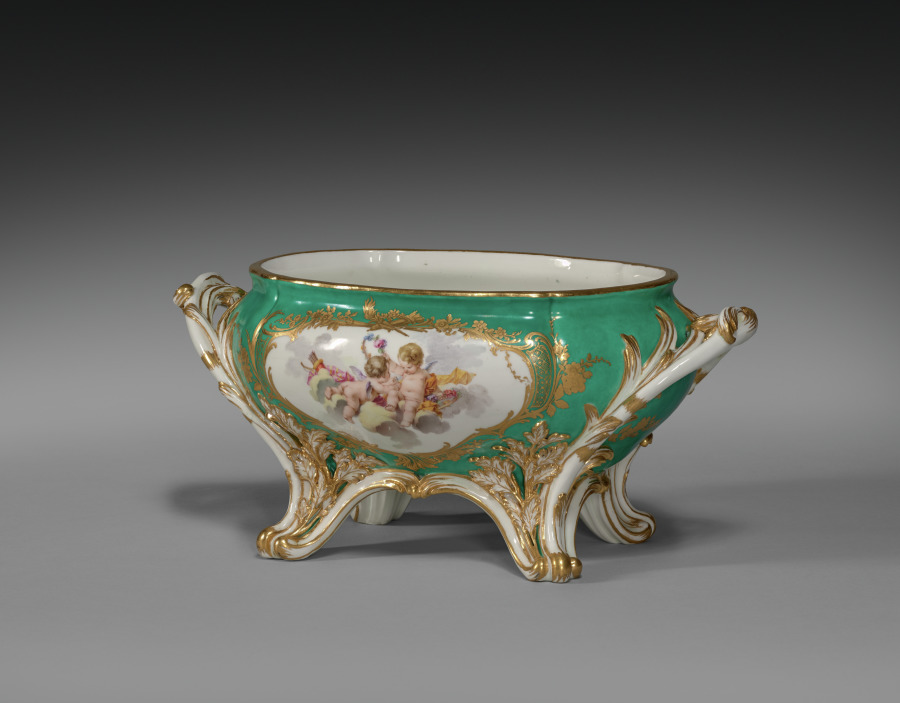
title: Tureen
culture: France, Sèvres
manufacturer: Sèvres Porcelain Factory (French, est. 1756)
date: 1756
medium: soft-paste porcelain with enamel and gilt decoration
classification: Ceramic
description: This tureen is probably from a service presented by Louis XV to King Frederick V of Denmark in 1758.